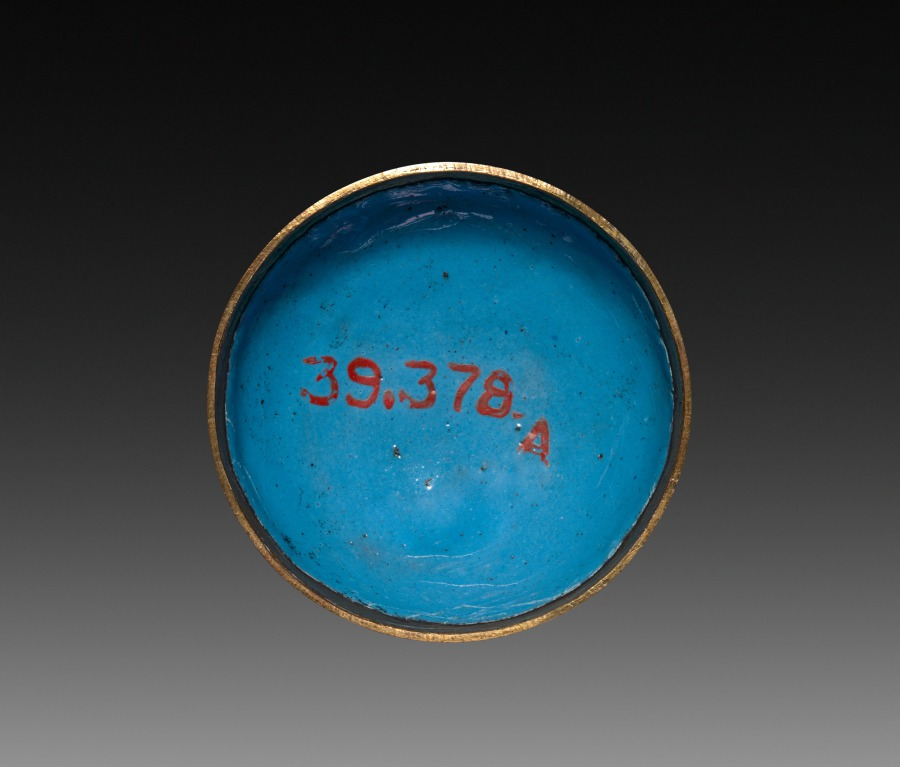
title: Box with Dragon (lid)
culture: Japan, Meiji period (1868–1912) to Taishō period (1912–26)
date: c 1900– 1925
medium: cloisonne enamel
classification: Enamel